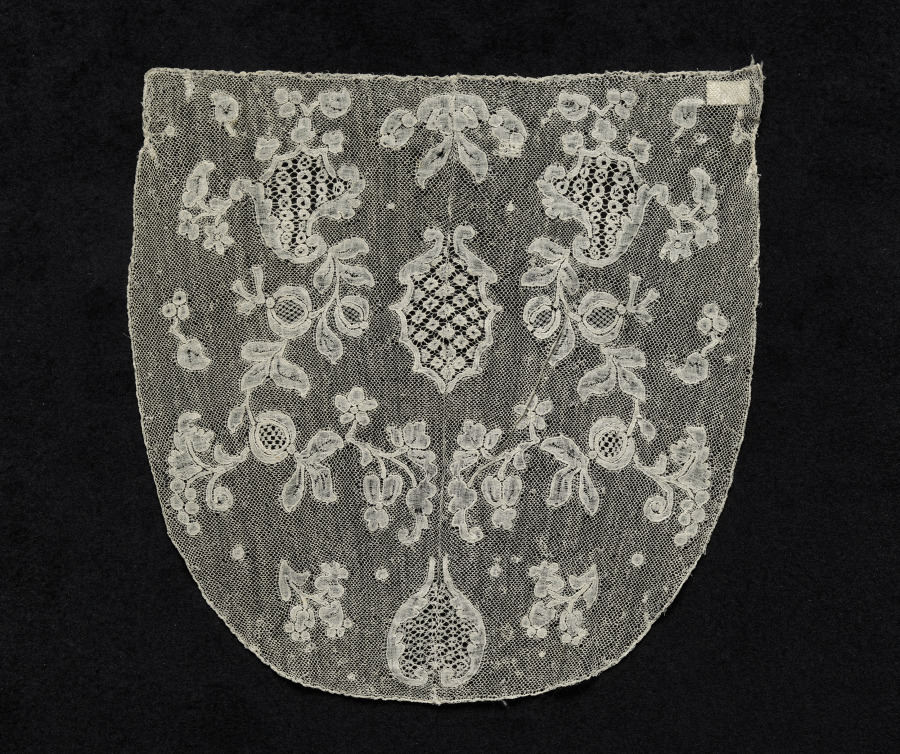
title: Lace Cap piece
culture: Belgium, Mechelen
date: 1700s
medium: Linen: bobbin lace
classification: Lace